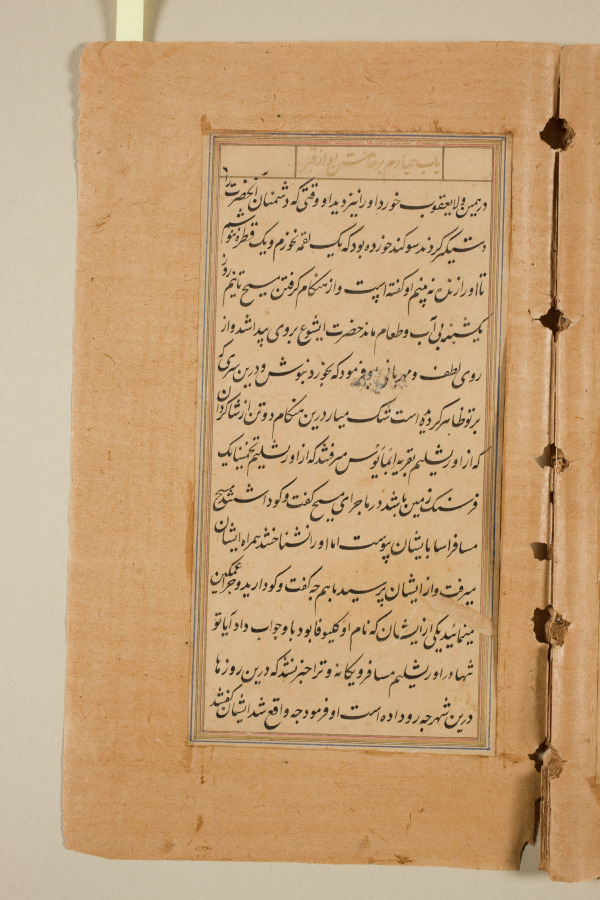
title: Text page from a Mirror of Holiness (Mir’at al-quds) of Father Jerome Xavier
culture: Mughal India, Allahabad, made for Prince Salim (1569–1627)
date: 1602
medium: Ink and gold on paper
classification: Manuscript